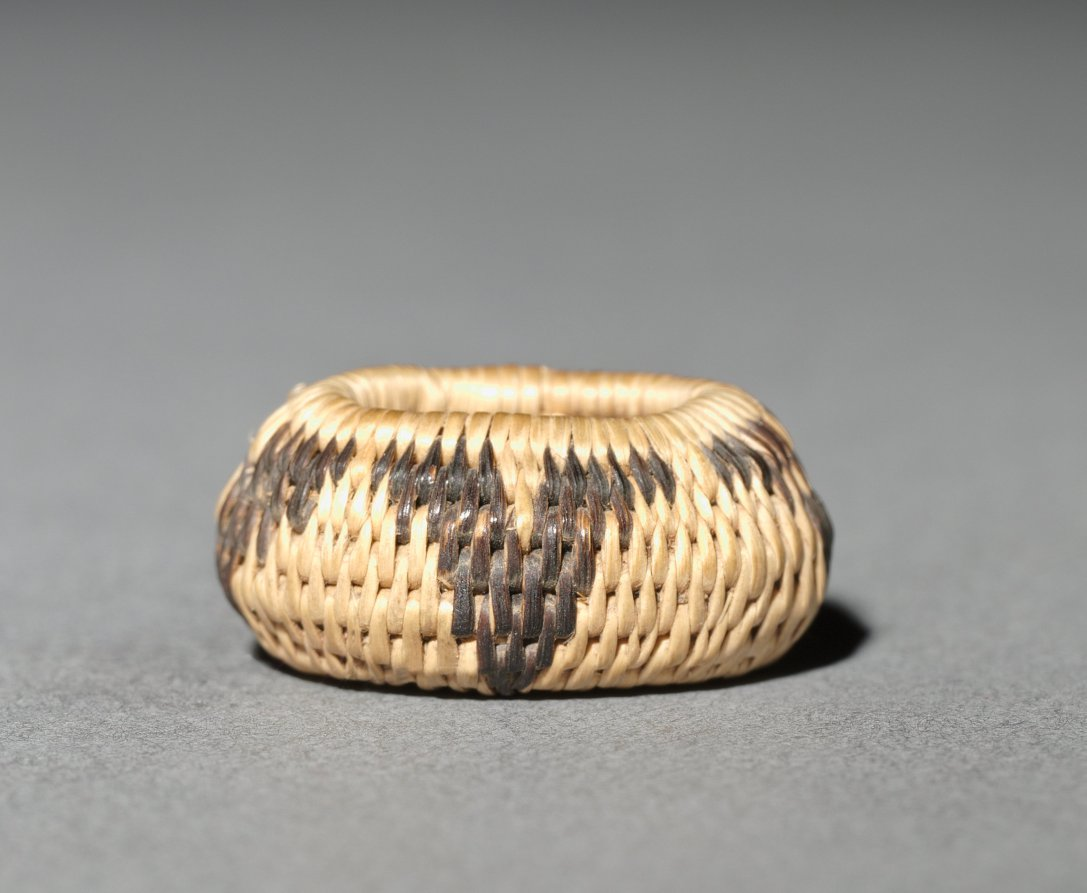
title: Miniature Basket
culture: America, Native North American, Southwest, Arizona, Akimel O'odham (Pima), Unassigned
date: before 1923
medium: plant fiber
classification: Basketry